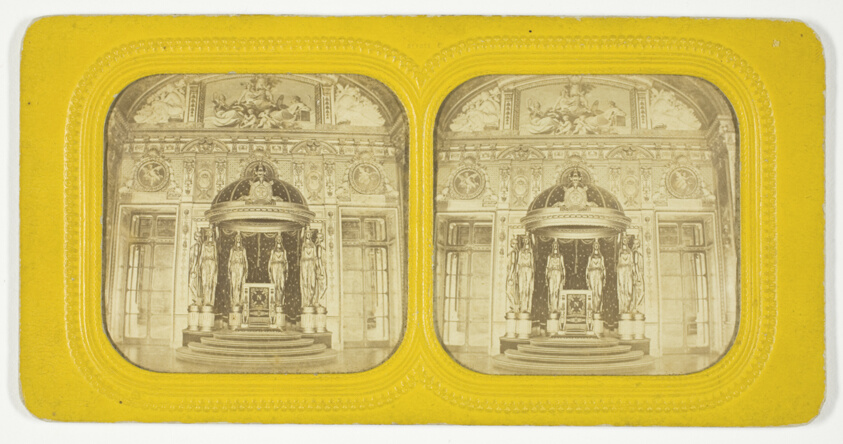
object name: Photograph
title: Throne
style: 19th century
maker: Deposé (French, active late 19th century)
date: 1875/99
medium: Albumen print, stereo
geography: France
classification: photography; photograph